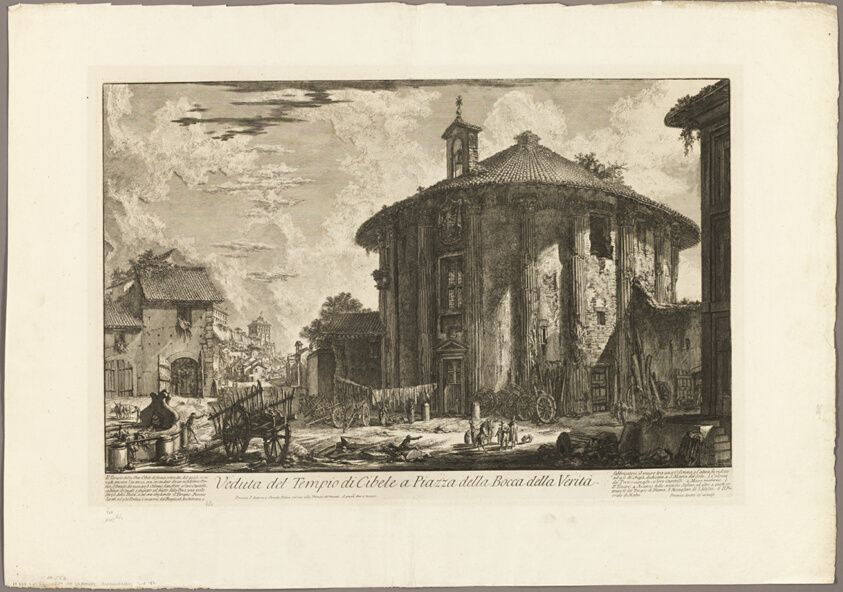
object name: Print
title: View of the Temple of Cybele in the Piazza of the Bocca della Verità, from Views of Rome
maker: Giovanni Battista Piranesi (Italian, 1720-1778)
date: 1750/59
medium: Etching on heavy ivory laid paper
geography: Italy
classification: etching; print; prints and drawing